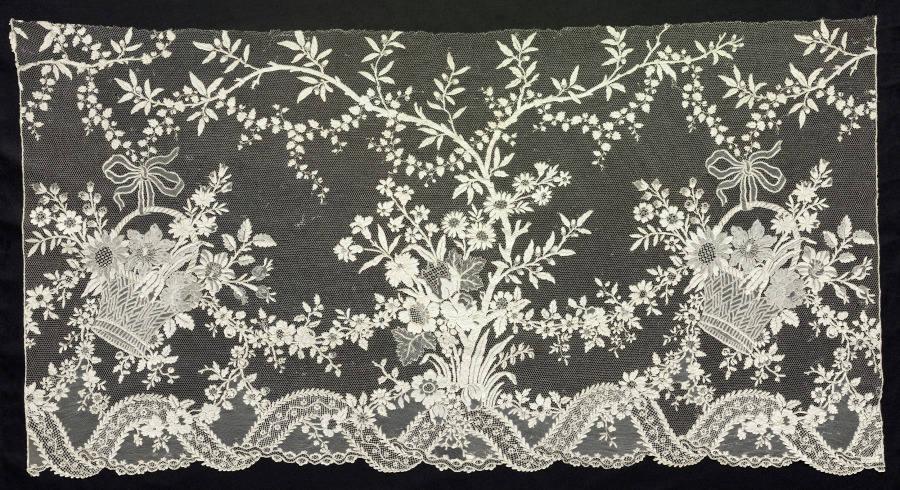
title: Fragment of Lace Flounce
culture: France, Argentan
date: 1740–60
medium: Linen: needle lace (Point d'Argentan)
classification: Lace